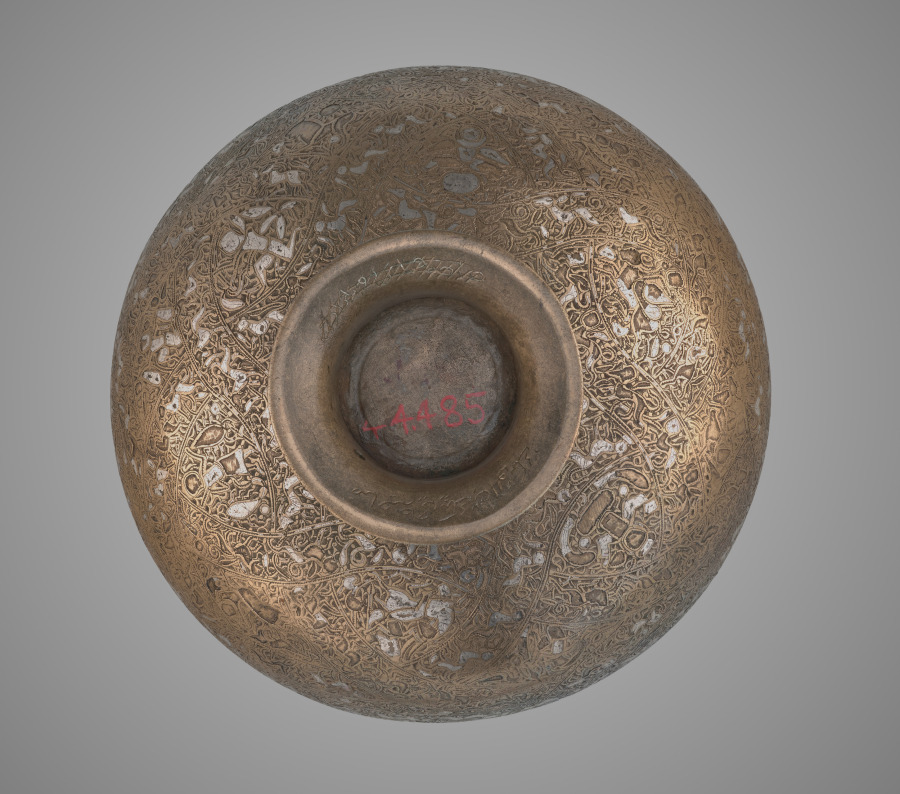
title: The Wade Cup with Animated Script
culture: Iran, Seljuq period of Iran (1037–1194)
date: 1200–1221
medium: brass inlaid with silver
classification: Metalwork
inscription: Glory, and success, and government, and bliss, and soundness, and peace of mind, and mercy, and well-being, and good health, and duration, and increase, and satisfaction, and care, and continuance to its owner.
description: The highlight of the cup’s decoration is the inscription around the rim, which you see on the walls around you, with letters composed of human figures, animals, and birds. This is known as animated script and it developed in northeast Iran or Afghanistan during the mid-1100s and migrated westward. The inscription on the rim of the Wade Cup is the pinnacle of this form of script with its full-figure animation. The body of the cup is covered with interlacing bands of compartments containing tiny figures of humans and animals. These represent the 12 signs of the zodiac from astrology, the practice of interpreting the influence of planets and stars on earthly affairs. Astrology began in Mesopotamia, was adopted by the Greeks, and then absorbed into medieval Islamic culture through translations of Greek texts.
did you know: This is known as the Wade Cup, after J. H. Wade who bequeathed the funds for its acquisition